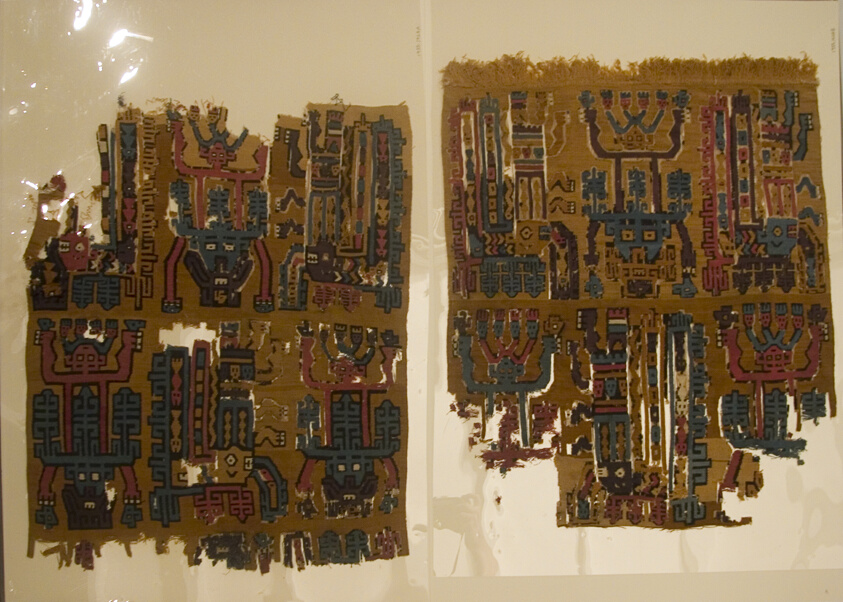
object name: Textile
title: Fragments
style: nazca, andean, andes, Pre-Columbian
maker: Nazca-Wari; Peru, Probably south coast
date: A.D. 700/900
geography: Peru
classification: textile; weaving